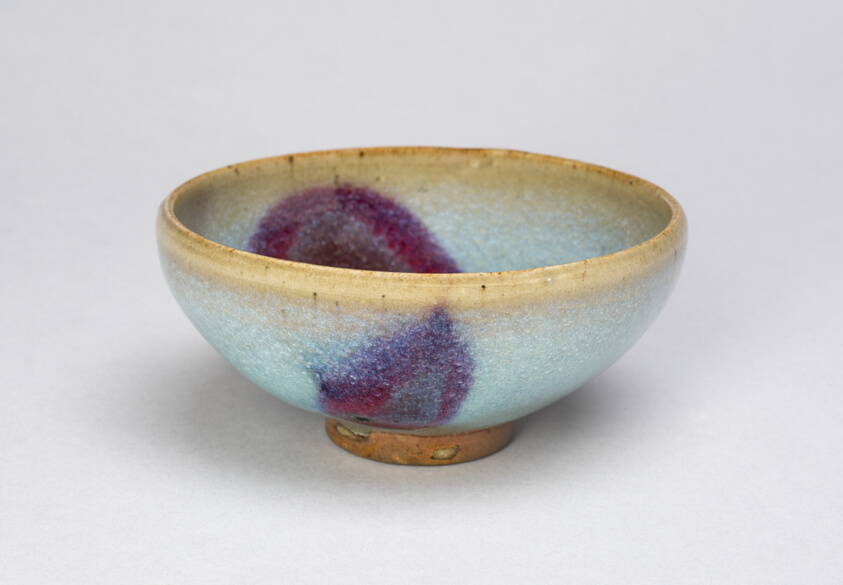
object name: Vessel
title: Small Cup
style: Chinese (culture or style)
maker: China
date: Jin dynasty, (1115–1234), 13th century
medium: Jun ware; stoneware with opaque pale-blue and crimson-splashed glaze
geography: China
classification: drinking vessel; stoneware; asian art; ceramics; vessel